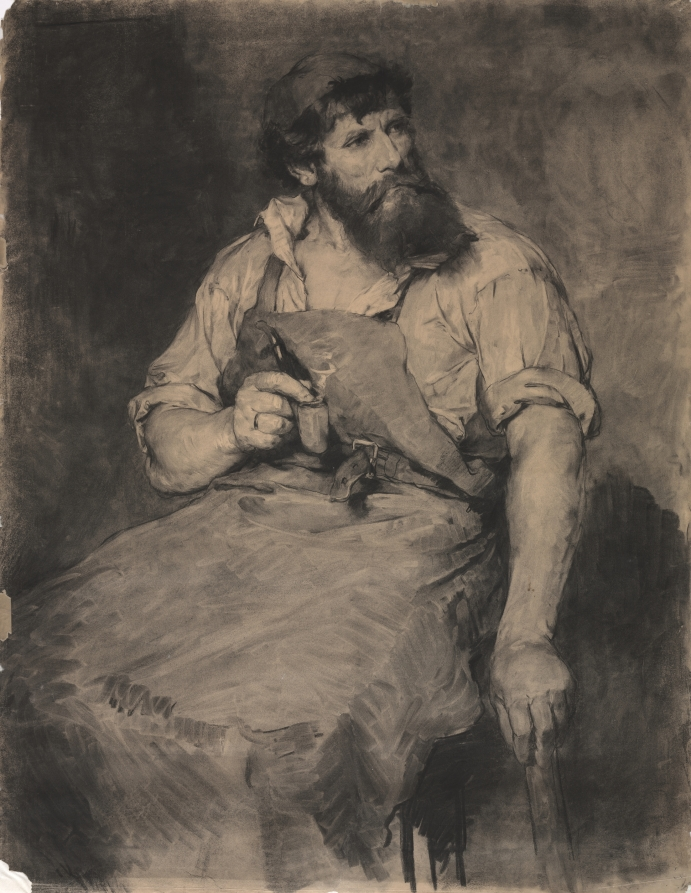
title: Smithy, study for "Das Gericht"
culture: America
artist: Samuel H. Crone (American, 1858–1913)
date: c.1883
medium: charcoal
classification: Drawing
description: Crone made Smithy while still a student at the Academy in Munich, and it reflects the style and subject matter favored there. Although it is a drawing, Smithy has the scale and impact of an oil painting. Crone executed the work in charcoal, which can be easily smudged, smeared, and manipulated. The artist used a brush or some other instrument to create large, painterly strokes, perhaps using water or another liquid to help him create brushy effects. This is especially impressive in the blacksmith's apron. Crone also chose a brown paper that exemplifies the dark tones of the Munich School. The drawing is related to a painting that became Crone's best-known work: The Judgement (Das Gericht). The painting was shown at an important exhibition in 1883 and, though lost today, is known from a reproduction that appeared in the exhibition's catalogue. The work depicted a burly blacksmith considering what to do about a young boy caught stealing apples in his shop. The present drawing clearly shows the same bearded model, though he is in a different pose: seated and holding a pipe. The figure has an impressive monumentality, dignity, and scale. The size of the sheet is unusual for a study drawing, and Crone no doubt intended it to stand as an independent work.